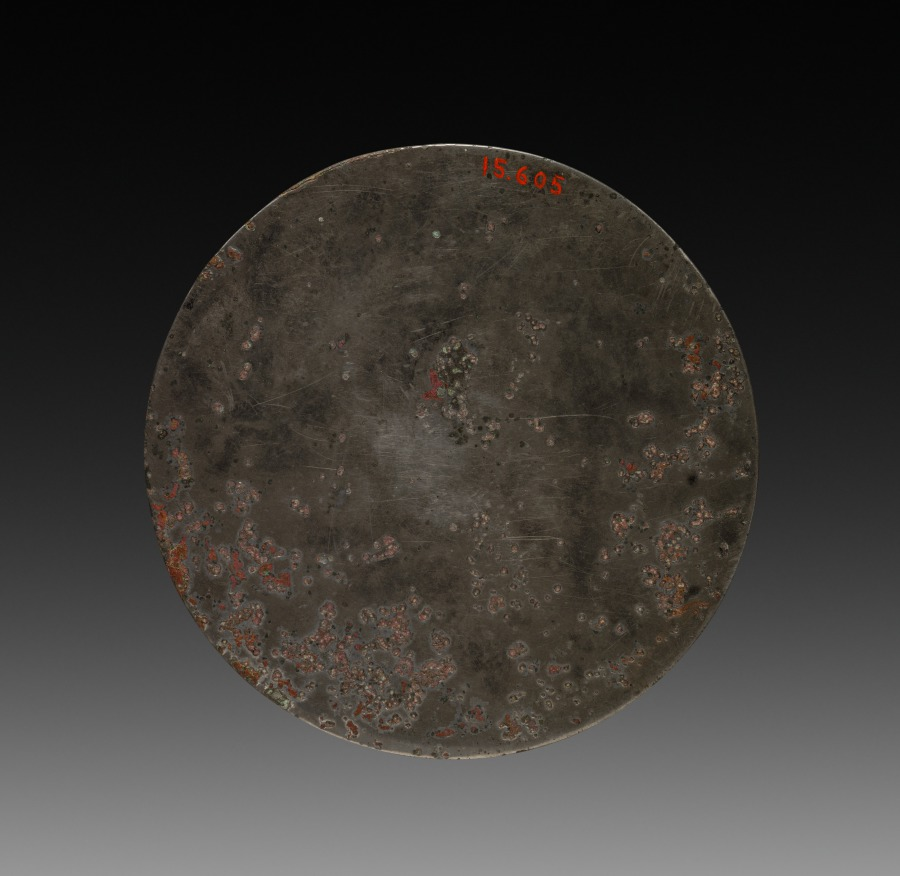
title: Mirror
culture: China, Tang dynasty (618-907)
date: 618–907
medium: bronze with silver inlay in lacquer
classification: Metalwork